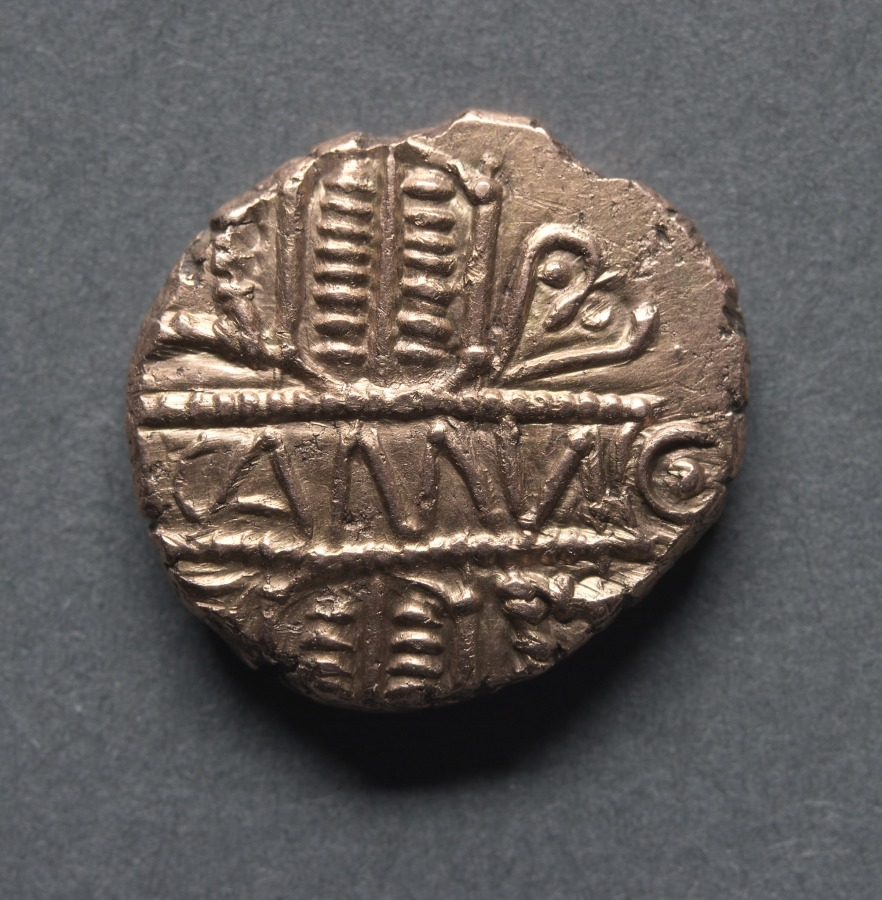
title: Cunobeline Stater: Tablet on Wreath (reverse); Two Horses and Wheel (reverse)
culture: England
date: c. 10–40 CE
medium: gold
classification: Coins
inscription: CAMVL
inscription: [CVNO]BELI[N]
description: Cunobeline is mentioned by various Roman historians. He was a powerful ruler, the son of Tasciovanus. He is known to have had one brother, Epaticcus, and possibly another, Sego, as well as two sons, Caratacus and Togodumnus. The history of this ancient time is very confused, particularly over family relationships; some of the sons and brothers may well have been sons-in-law and brothers-in-law. Cunobeline had his capital at Camulodunum, now Colchester. The workmanship of this extremely rare piece is remarkable in many ways. Study of the obverse shows that at least one of the V-shaped ornaments referred to by scholars is traditionally described as "heart" shape. In fact it is the little ivy leaf frequently found on Roman coins. The two well-executed, three-dimensional spirited horses on the reverse are unusual. One such animal is normally all the engraver of the period usually attempts. The wheel of the lost chariot is still present and the neat design of a leaf as an ornament is interesting. All this design detail serves to crowd off all but a few letters of the ruler's name. The CAMVL on the obverse makes this one of the earliest British native coins to state its mint town origin.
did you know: Cunobeline's name is derived from Common Brittonic Cunobelinos, which translates to "strong as a dog."